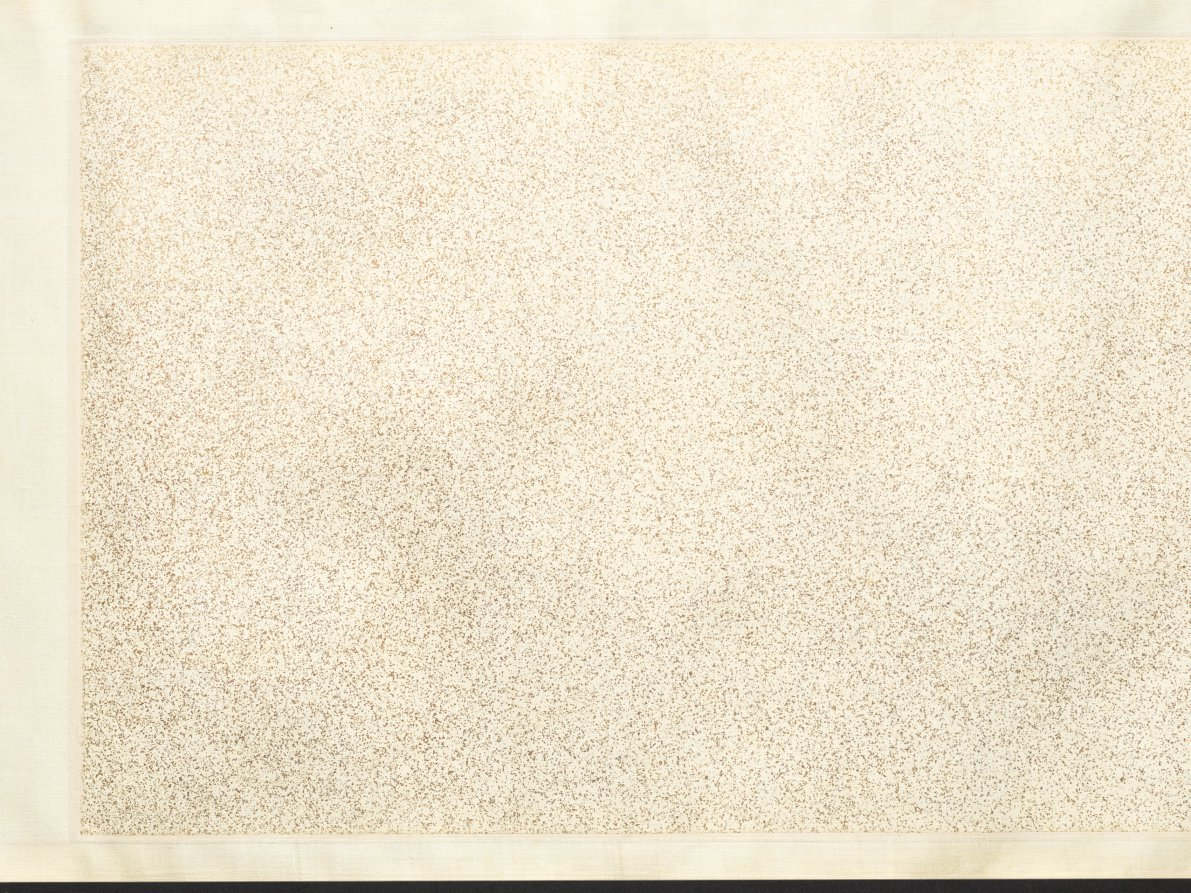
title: Fisherman's Joy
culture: China, Ming dynasty (1368–1644)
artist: Qian Gu (Chinese, 1508–c. 1578)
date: 1572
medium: Handscroll; ink and light color on paper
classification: Painting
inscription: Artist's inscription, signature, and seal: On the autumn day of the jen-shen year [1572], P'eng-ch'eng, Ch'ien Ku painted [this]. [seal] Hsüan-ch'ing shih. 2 colophons, both dated 1689, and 5 additional seals of Yün Shou-p'ing (1633-1690).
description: This painting has a scene showing two small crafts, each manned by two fishermen, practicing a traditional fishing method. In one of them, a man uses a bamboo pole to direct the movements of a cormorant bird sent into the water. Cormorant fishing, witnessed in some areas of the lower Yangzi River, appears in Zhe school paintings. Qian Gu may have borrowed these narrative figure scenes from Zhe school paintings, while his vantage point, brushwork, and soft tones align with the Wu school style. Scenes of fishermen appealed to urban and educated audiences who idealized the self-sufficient independence of fisherfolk.